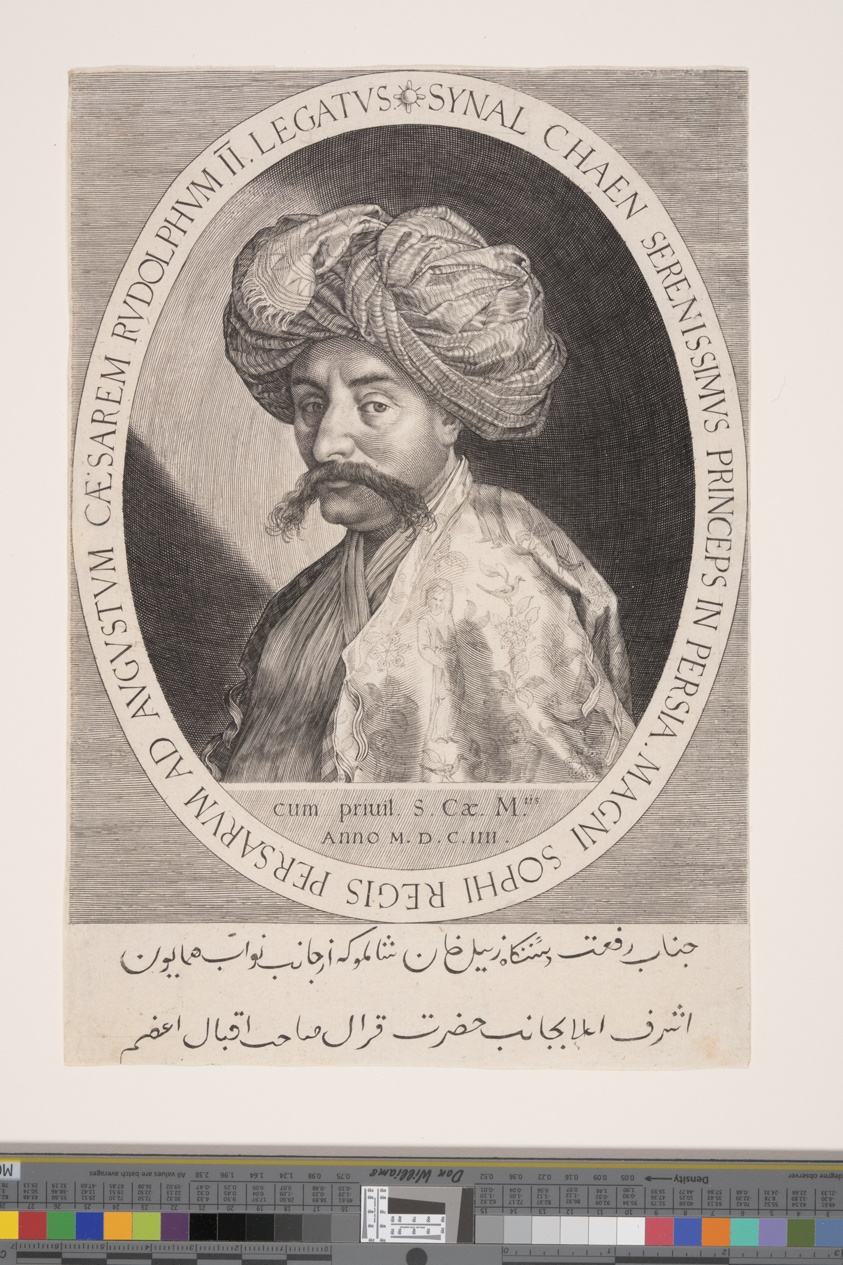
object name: Print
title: Synal Chaen (Zeynal Khan Shamlu), Persian Ambassador in Prague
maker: Aegidius Sadeler II; Flemish, c. 1570–1629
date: 1604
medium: Engraving on laid paper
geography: Flanders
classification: print; engraving; paper; prints and drawing